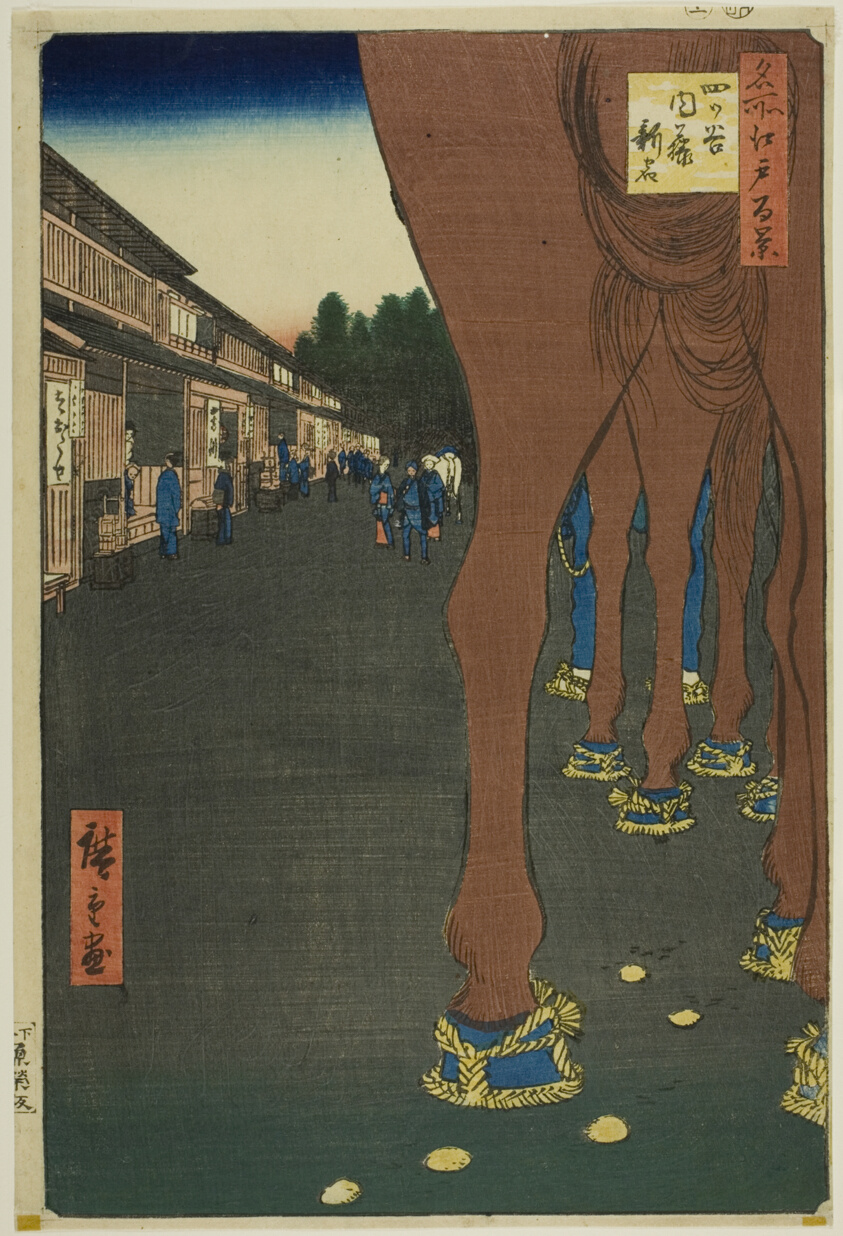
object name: Print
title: Naito Shinjuku at Yotsuya (Yotsuya Naito Shinjuku), from the series “One Hundred Famous Views of Edo (Meisho Edo hyakkei)”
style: Japanese (culture or style)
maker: Utagawa Hiroshige 歌川 広重; Japanese, 1797–1858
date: 1857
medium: Color woodblock print; oban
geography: Japan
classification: woodblock print; print